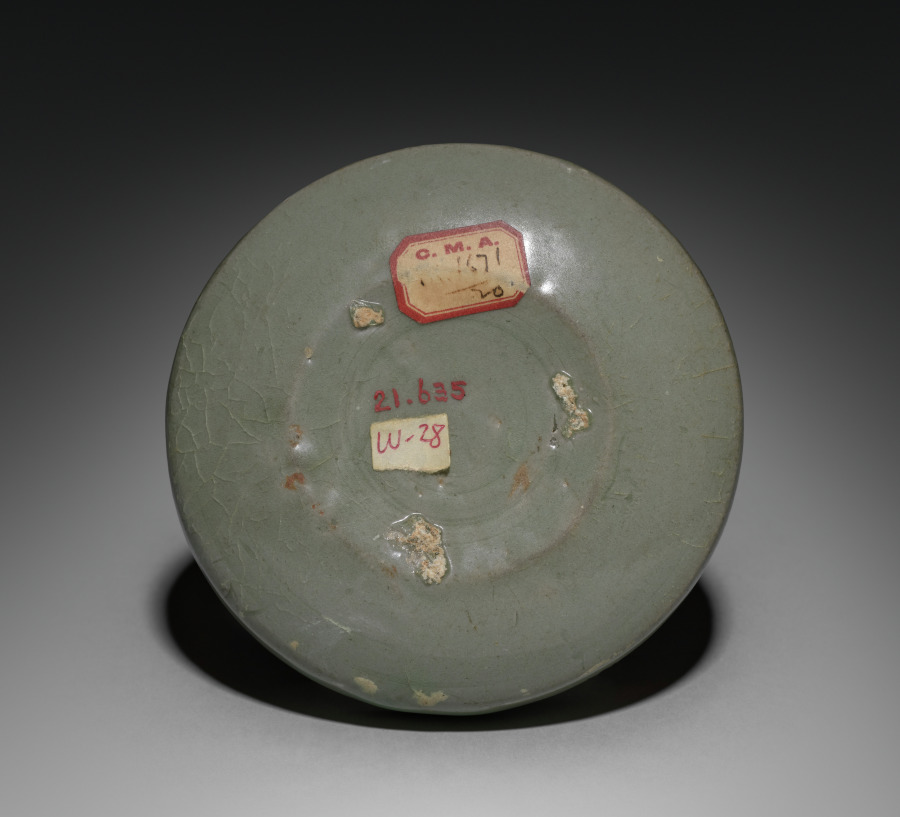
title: Box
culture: Korea, Goryeo dynasty (918–1392)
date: 918–1392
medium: pottery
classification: Ceramic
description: Celadons, spoons, seals, and bronze mirrors were the most common burial objects in tombs during the Goryeo period (918–1392). Once used to contain colored powder, rouge, and eyebrow gel for makeup, this small container was one of the standard goods that furnished tombs of the elites. Both women and men used the grain powder of rice or millet for whitening their skin, safflower extract for rouge, and plant ash or soot for eyebrow gel. Yet, natural-looking makeup seems to have been the most favorable one in Korea according to the travelogue by Xu Jing (1091–1153), the Chinese diplomat who visited Korea in 1123.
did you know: This ceramic container was used to store either incense or cosmetics.